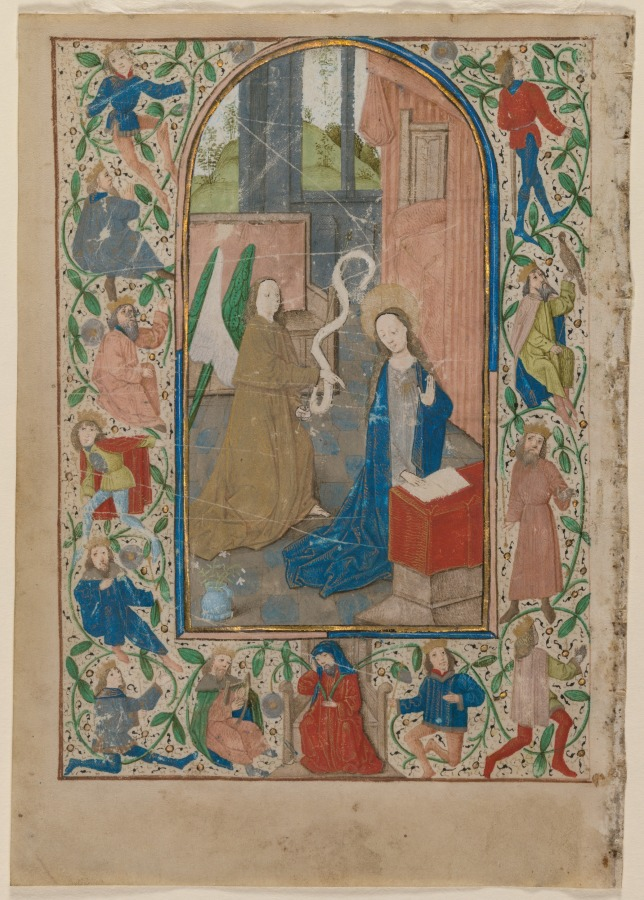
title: Leaf from a Book of Hours: The Annunciation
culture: Flanders, Ghent (?)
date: 1470s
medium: ink, tempera, and gold on vellum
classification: Manuscript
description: The Annunciation is the traditional introduction to matins, the first of the eight canonical hours. This striking scene recalls the archangel Gabriel's announcement to the Virgin Mary that she was to become the mother of God. The humble scene, steeped in monumentality and innocence, honors one of the most significant moments in Christian history—the coming of God into the world. Flemish artists, in particular, tenderly elaborated this event. The Virgin is usually shown within an architectural interior. Typically her bedroom, this interior space includes a curtained bed, a wooden bench, windows through which a landscape is revealed, and a simple earthenware ewer filled with lilies that proclaim her innocence. Within this private setting, Mary kneels to read from an open book of hours. Her prayer is interrupted by the angel's appearance and she is captured by the artist in stunned surprise. The miniature is accompanied by an illustration in the margins of the Tree of Jesse, the family tree showing Jesus's human descent from Jesse, the father of King David, through the royal house of Judah. The motif begins in the lower margin with the seated Jesse, from whom a tree grows. David, Solomon, and various kings and prophets can be seen in its branches.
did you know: A raised hand indicates Mary's stunned surprise.